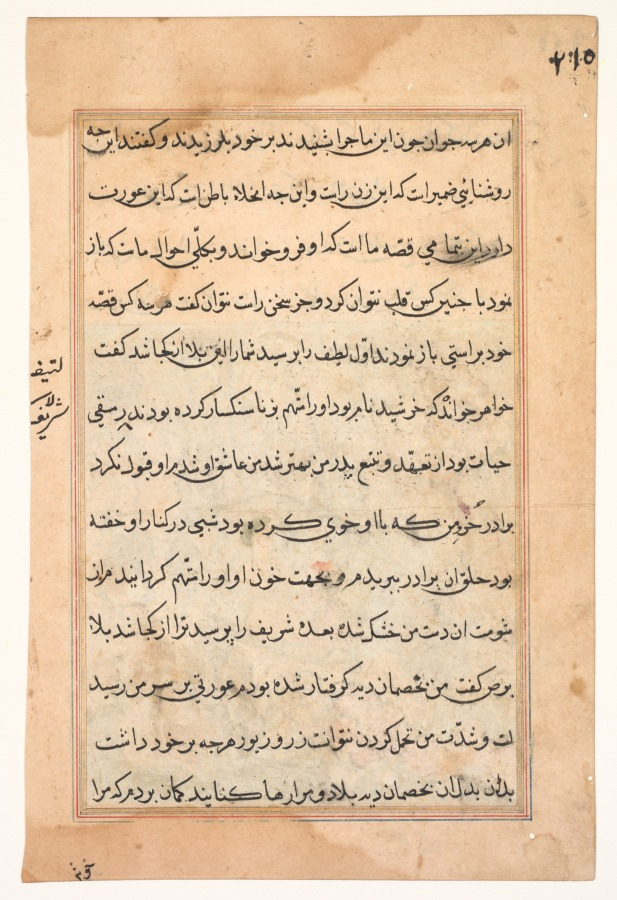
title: Page from Tales of a Parrot (Tuti-nama): text page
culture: Mughal India, court of Akbar (reigned 1556–1605)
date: c. 1560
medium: gum tempera, ink, and gold on paper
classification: Painting